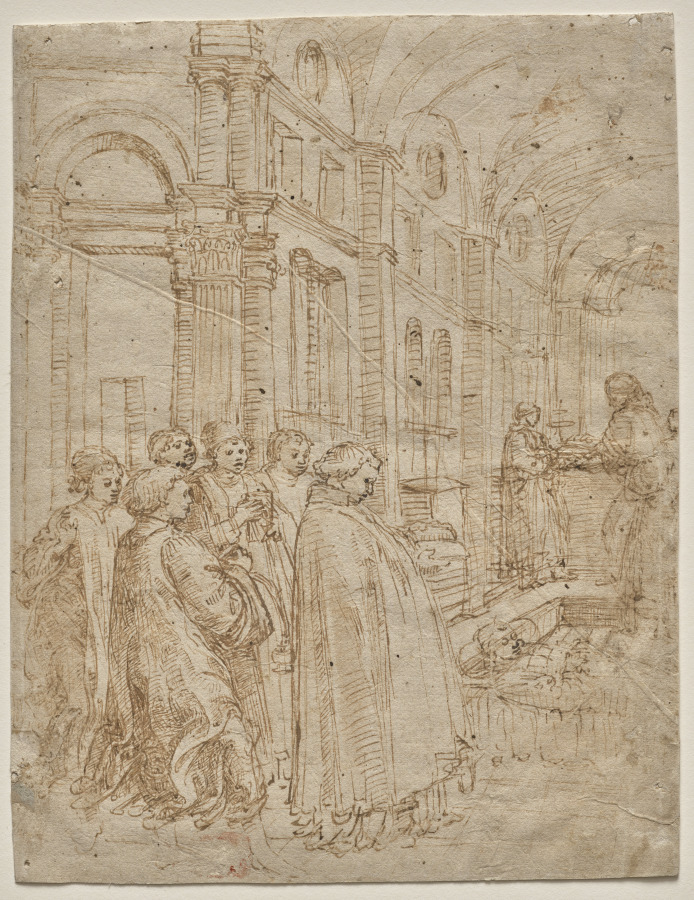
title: The Funeral of Saint Stephen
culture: Italy, Florence, 15th century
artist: Fra Filippo Lippi (Italian, c. 1406–1469)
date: c. 1460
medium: pen and brown ink with brush and brown wash with traces of stylus over traces of black chalk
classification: Drawing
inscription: verso of secondary support, center, in brown ink: Pordonone Fece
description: Few drawings exist from the mid-1400s in Italy, and most that have are figure and drapery studies from artist's model books. So this sheet is extremely important as one of the few known compositional studies by a major artist from this period. Stylistic comparison to other drawings by Lippi and the fact that it relates to a fresco painting by him of the same subject confirms its authenticity.